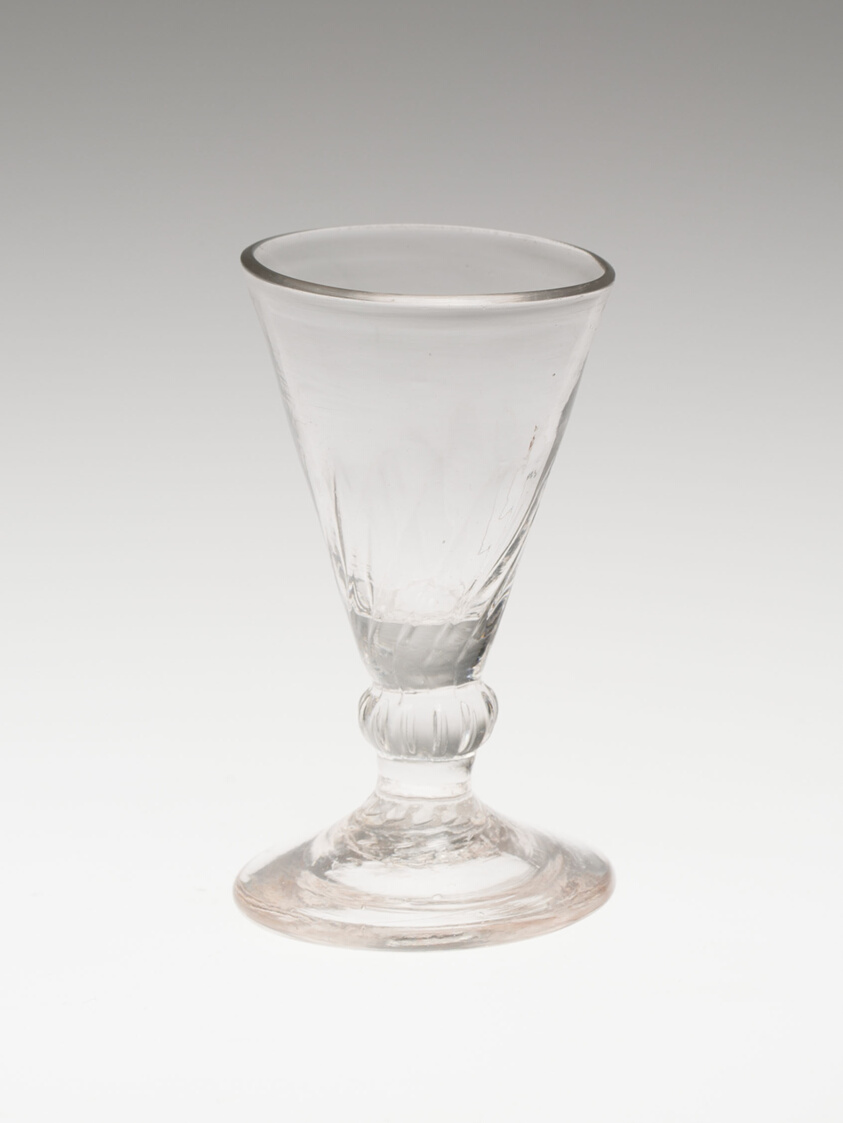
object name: Glass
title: Ale Glass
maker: England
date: 1750/1850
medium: Glass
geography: England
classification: drinking vessel; glass